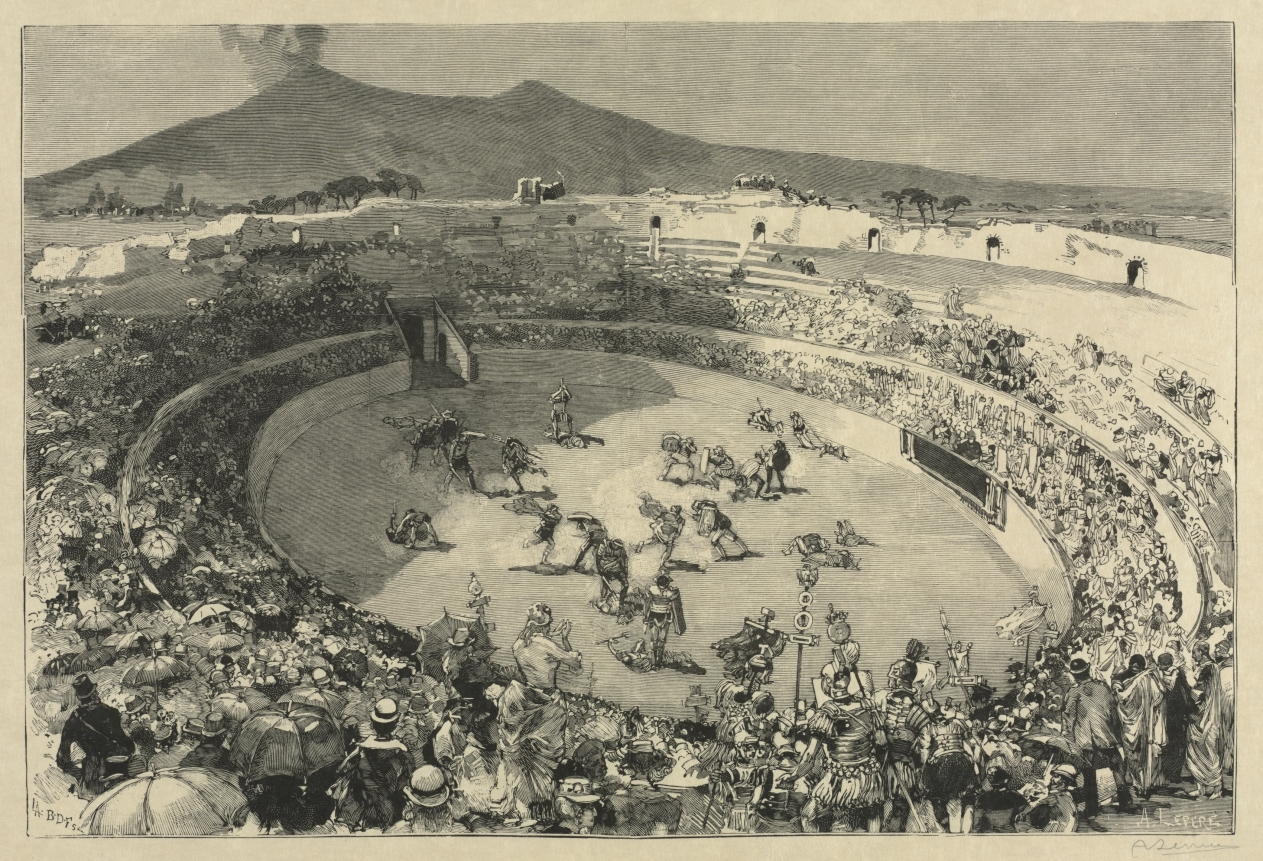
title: Italy. The Festival of Pompei, The circus of gladiators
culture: France, 19th century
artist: Auguste Louis Lepère (French, 1849–1918)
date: 1884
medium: wood engraving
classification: Print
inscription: lower right, in pencil: "A Lepere"